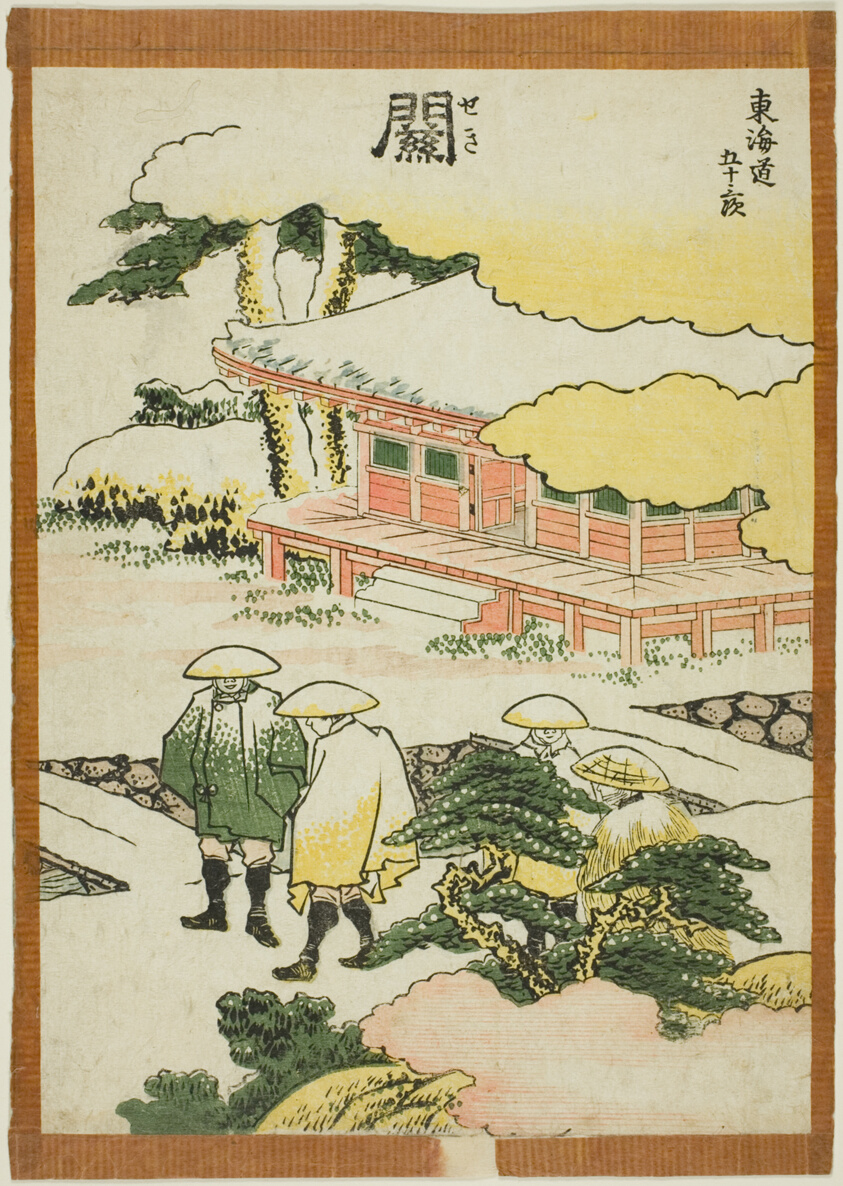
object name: Print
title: Seki, from the series "Fifty-three Stations of the Tokaido (Tokaido gojusan tsugi)"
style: Japanese (culture or style)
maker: Katsushika Hokusai 葛飾 北斎; Japanese, 1760-1849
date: c. 1806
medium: Color woodblock print; chuban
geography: Japan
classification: woodblock print; print; asian art